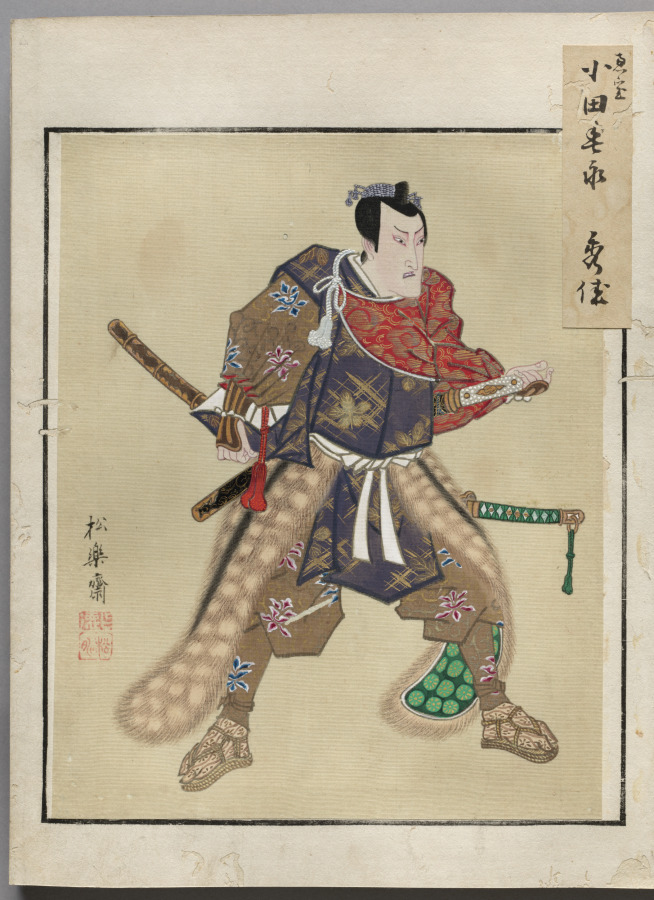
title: Double-Leaf from Album of Actor Portraits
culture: Japan, Edo period (1615–1868)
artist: Shōrakusai (Japanese)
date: c. 1790–1810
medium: double-leaf from an accordion-style album; ink and color on silk (left)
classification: Bound Volume